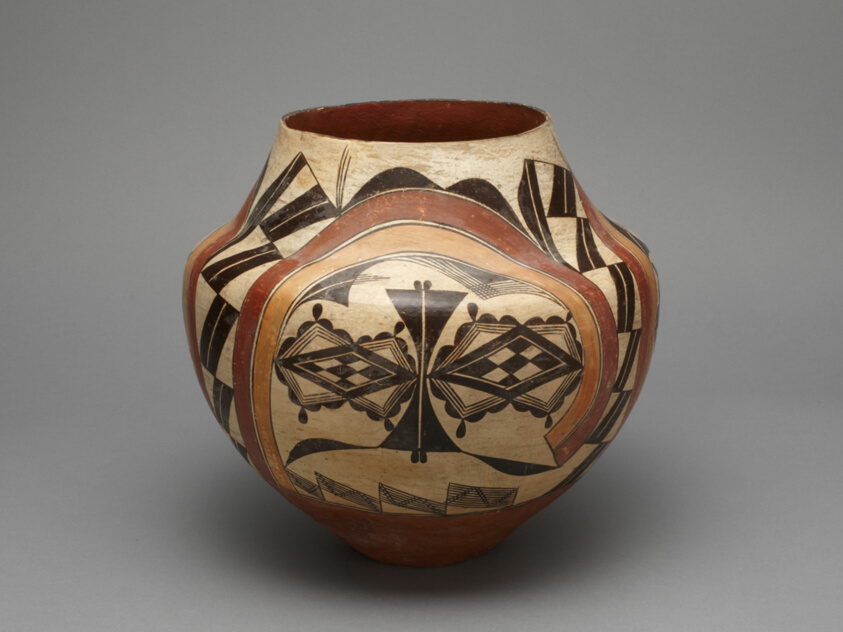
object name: Vessel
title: Polychrome Jar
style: acoma, southwest, pueblo, Arts of the Americas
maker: Acoma; Acoma Pueblo, New Mexico, United States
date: c. 1880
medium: Ceramic and pigment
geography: New Mexico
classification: vessel; ceramics; art of the americas